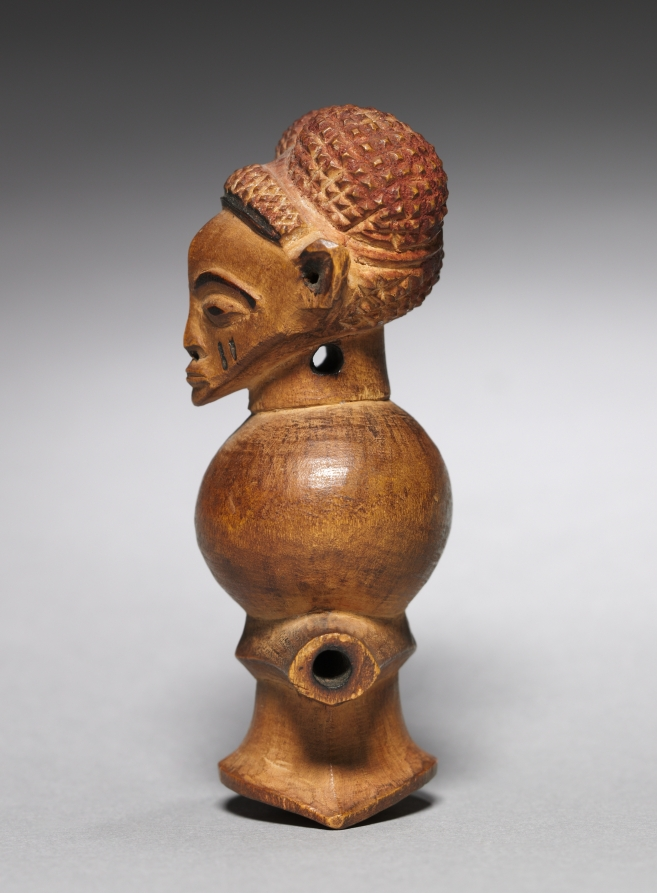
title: Whistle (kasengosengo)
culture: Africa, Central Africa, Democratic Republic of Congo, Pende-style maker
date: before 1915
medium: wood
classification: Musical Instrument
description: This small whistle displays a finely detailed head with bi-lobed coiffure similar to Pende masks.